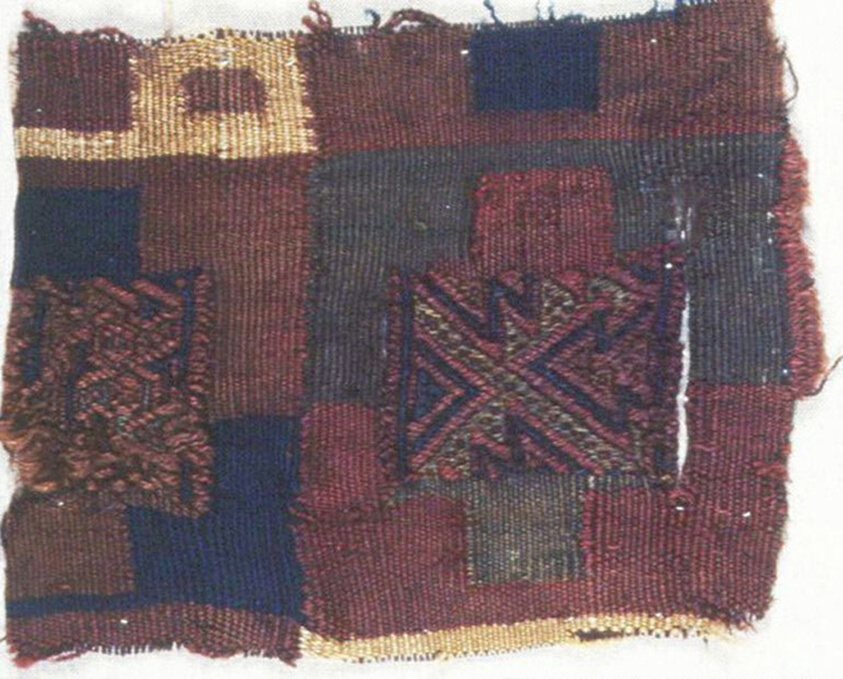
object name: Textile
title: Fragment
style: Chuquibamba, inca, late intermediate period, Pre-Columbian, americas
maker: Chuquibamba (Probably south coast, Peru)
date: A.D. 1476/1532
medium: Wool (camelid), interlocking tapestry weave with inserts of complementary weft weave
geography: Peru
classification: textile; weaving